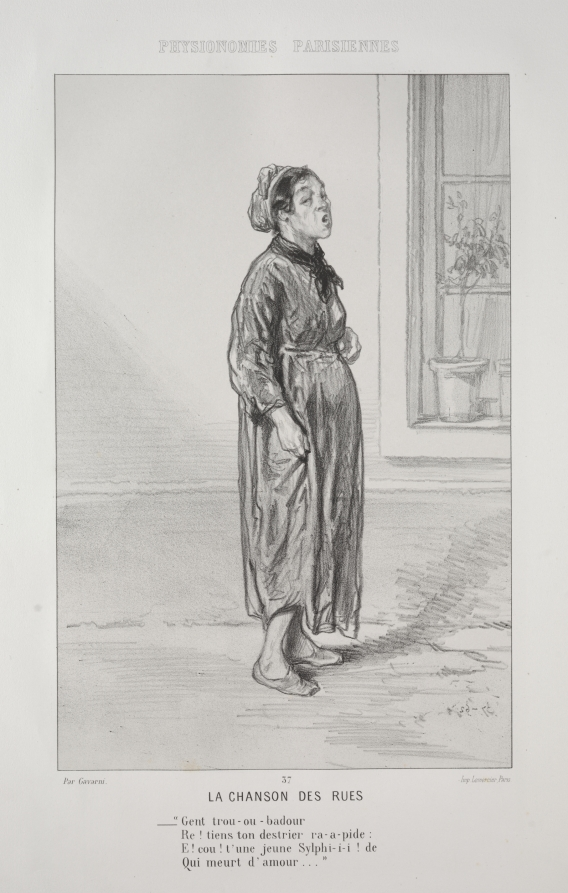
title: La Chanson des Rues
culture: France, 19th century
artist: Paul Gavarni (French, 1804–1866)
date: c. 1858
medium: lithograph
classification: Print